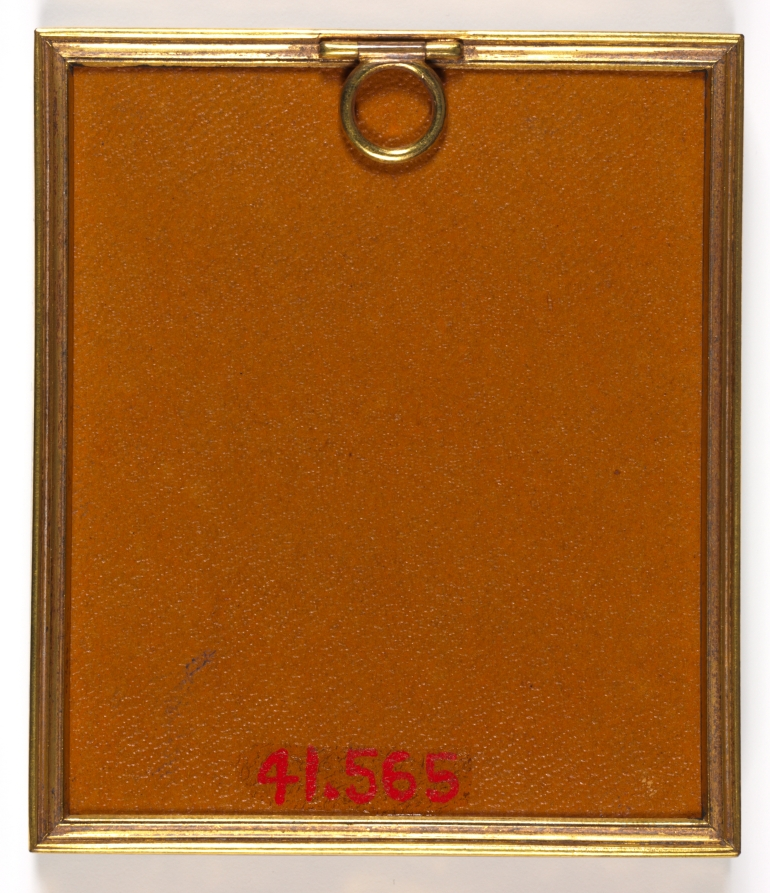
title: Portrait of a Woman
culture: England, 18th century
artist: John I Smart (British, 1741–1811)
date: c. 1776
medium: graphite and wash on laid paper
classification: Portrait Miniature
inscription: inscribed on front of paper at upper right corner: 119 (or 115?); inscribed on paper backing, in graphite, upside down at lower left: 10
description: Although it is impossible to say if it was always part of the artist’s process to execute a preparatory sketch prior to painting each miniature, we do know that John Smart retained many hundreds of these sketches. A group of preparatory sketches—of which this portrait is one—descended through the Smirke family after Smart’s daughter Sarah gave a sketchbook containing preparatory portrait studies to her friend Mary Smirke, sister of the celebrated Victorian architect Sydney Smirke. This book was probably broken up around 1877 when it was divided between Sydney’s daughters Mary Jemmett and Mrs. Lange, whose portions were both sold at auction in 1928. Compared to his contemporaries George Engleheart (1752–1829) and Andrew Plimer (1763–1837), whose female sitters were often painted in similar simple white gowns, Smart often lavished more attention on the costumes in his portraits of women, whose dresses incorporated colored silks, printed fabrics, and luxury trimmings like lace and fur. The sitter’s head and shoulders face left. She has what was probably once blond hair—now faded to pink—dressed high on her head, with curls down the back of her neck, over which a veil descends. Her eyes are hazel, and the color of her lips has almost completely faded. Positioned in an oval, and revealing much of her left breast, she wears a low-necked dress with faint traces of pink pigment, trimmed with a string of pearls. The background is unpainted. To this date, the finished ivory for which this preparatory sketch was presumably undertaken has not been discovered. The portrait was assigned the historically colorful but fictitious title of “Henrietta Maria” at some point after memory of its true identity had been lost. Giving illustrious titles to portraits of unknown sitters was a popular strategy adopted by dealers during the nineteenth and twentieth centuries, often applied to miniature portraits and, in particular, to Smart’s sketches of women. In 1948 Arthur Jaffé wrote to the Cleveland Museum of Art that a “Mrs. Samuelson of Exeter recently brought me two frames, with six sketches mounted in each, of ladies, mostly with fancy names. I think there is no doubt that they were part of Mrs. Lange’s share of the Smirke sketches, though unlike yours they did not pass through Christie’s auction in Dec. 1928. I persuaded Mrs. Samuelson to let me remove them from their frames and to rub the paper backing from the card on which the sketches are painted. The result was as follows. Included was a No. 115 called, Margaret, Archduchess of Austria, which is the same number given to our Henrietta Maria.” Elsewhere Jaffé notes that the number on the front of this sketch was probably a 119 instead of a 115.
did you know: Sketches helped John Smart work out the particulars of a portrait before commencing the miniature on ivory; they were useful in the event that a duplicate might later be required.